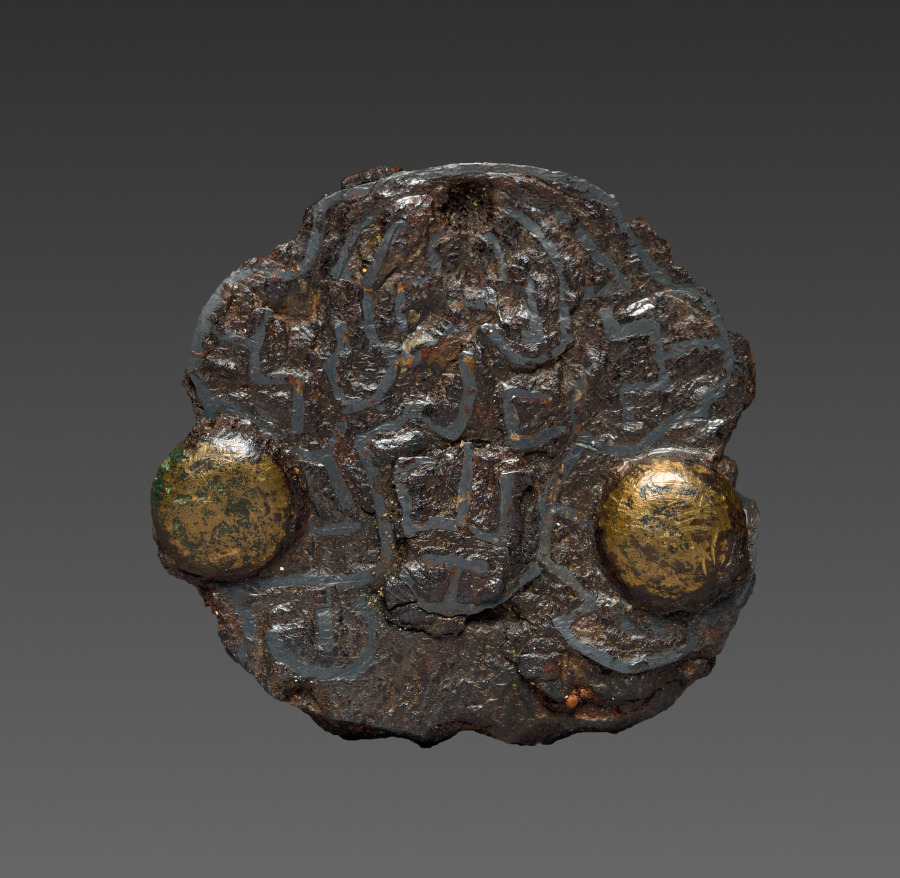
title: Brooch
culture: Merovingian, Burgundian, Migration period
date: 600s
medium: bronze and silver overlay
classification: Jewelry